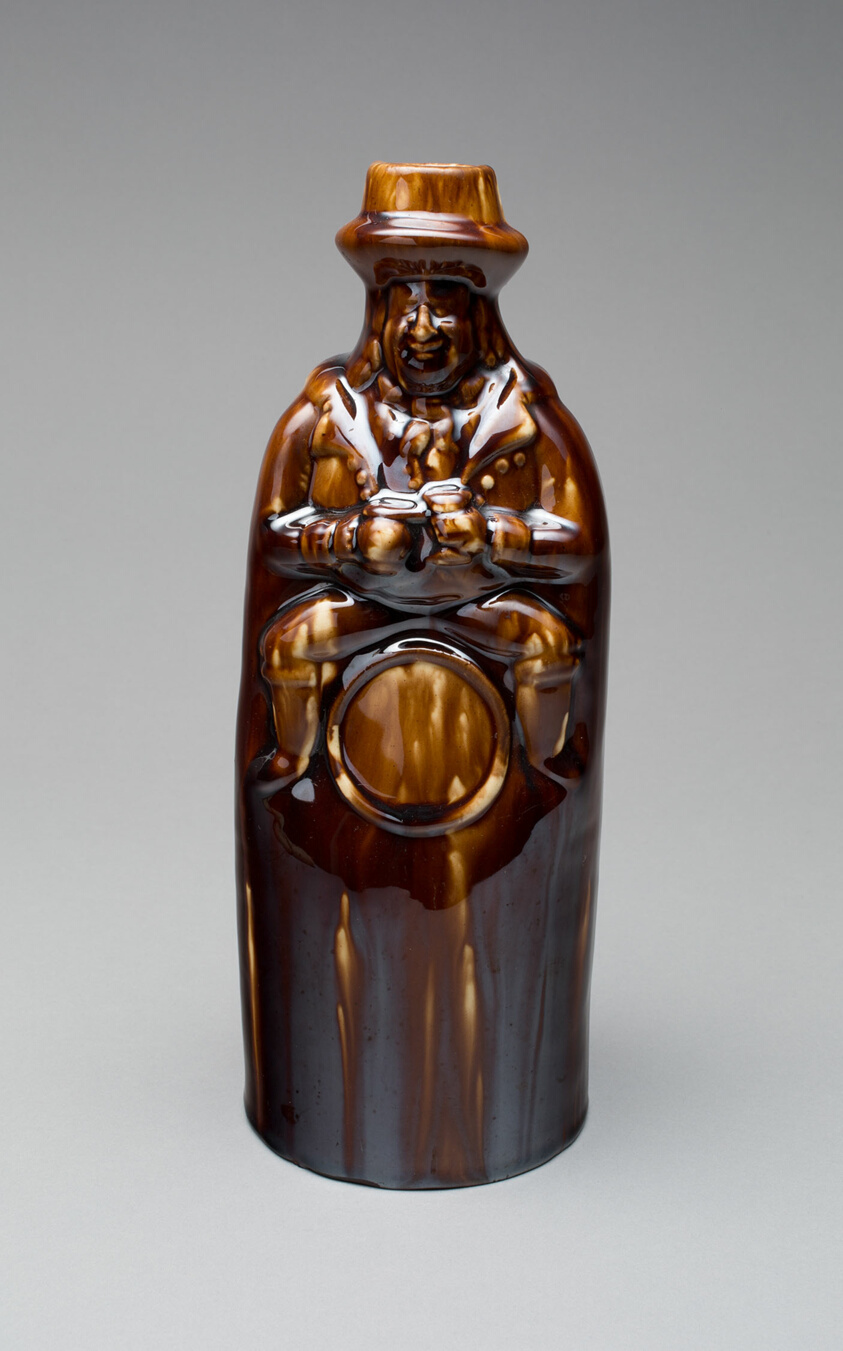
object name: Decorative Arts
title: Bottle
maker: Lyman, Fenton & Company; American, 1849–52; Bennington, Vermont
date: 1849–52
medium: Earthenware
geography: Bennington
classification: vessel; bottle; american decorative arts; american arts; ceramics; decorative arts